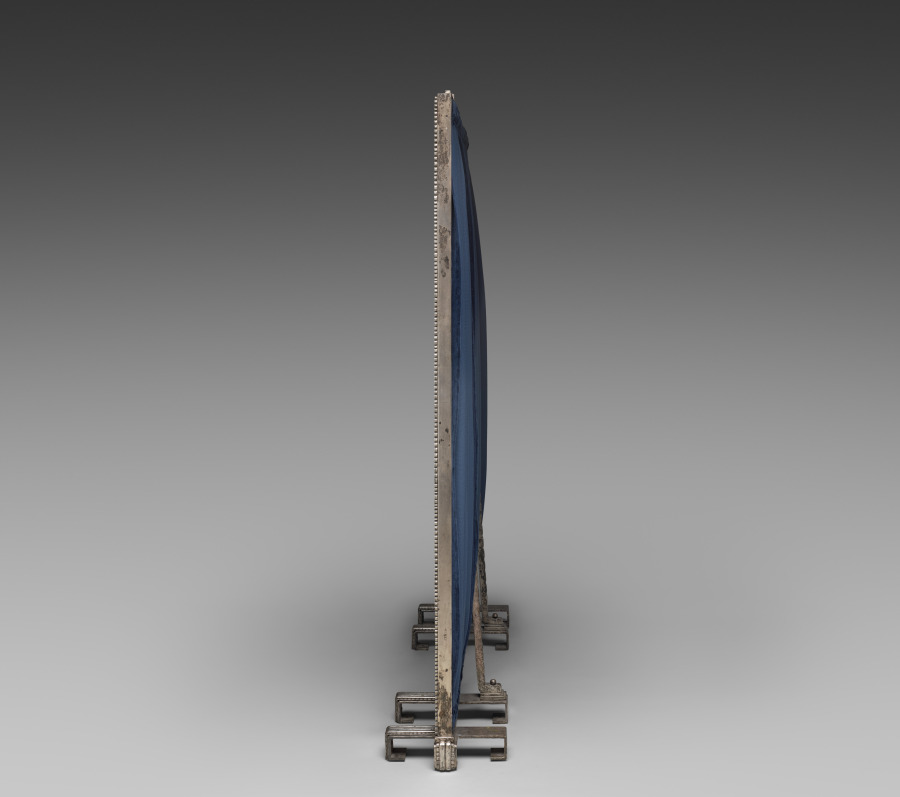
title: Muse with Violin Screen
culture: America, Ohio, Cleveland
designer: Paul Fehér (American, born Hungary, 1898–1990)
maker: Rose Iron Works (America, Ohio, Cleveland, est. 1904)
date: 1930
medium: Steel, brass; silver and gold plating, cotton velveteen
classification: Metalwork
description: Since the early years of the 20th century, the Rose Iron Works, a Cleveland supplier of architectural ornament, has produced distinguished metalwork. The company’s founder, Martin Rose, was born in Austria-Hungary and studied ornamental metalsmithing in Vienna prior to immigrating to Cleveland in 1902. In the 1920s, he hired a talented young Parisian designer, Paul Fehér, to work for the firm. Fehér’s designs, culminating in this massive screen, brought a modern European sensibility to the Rose Iron Works production. With its geometric patterning, highly stylized and abstracted natural forms, and the central figure reminiscent of the celebrated jazz singer Josephine Baker, this screen reflects the classic motifs of Art Deco design.